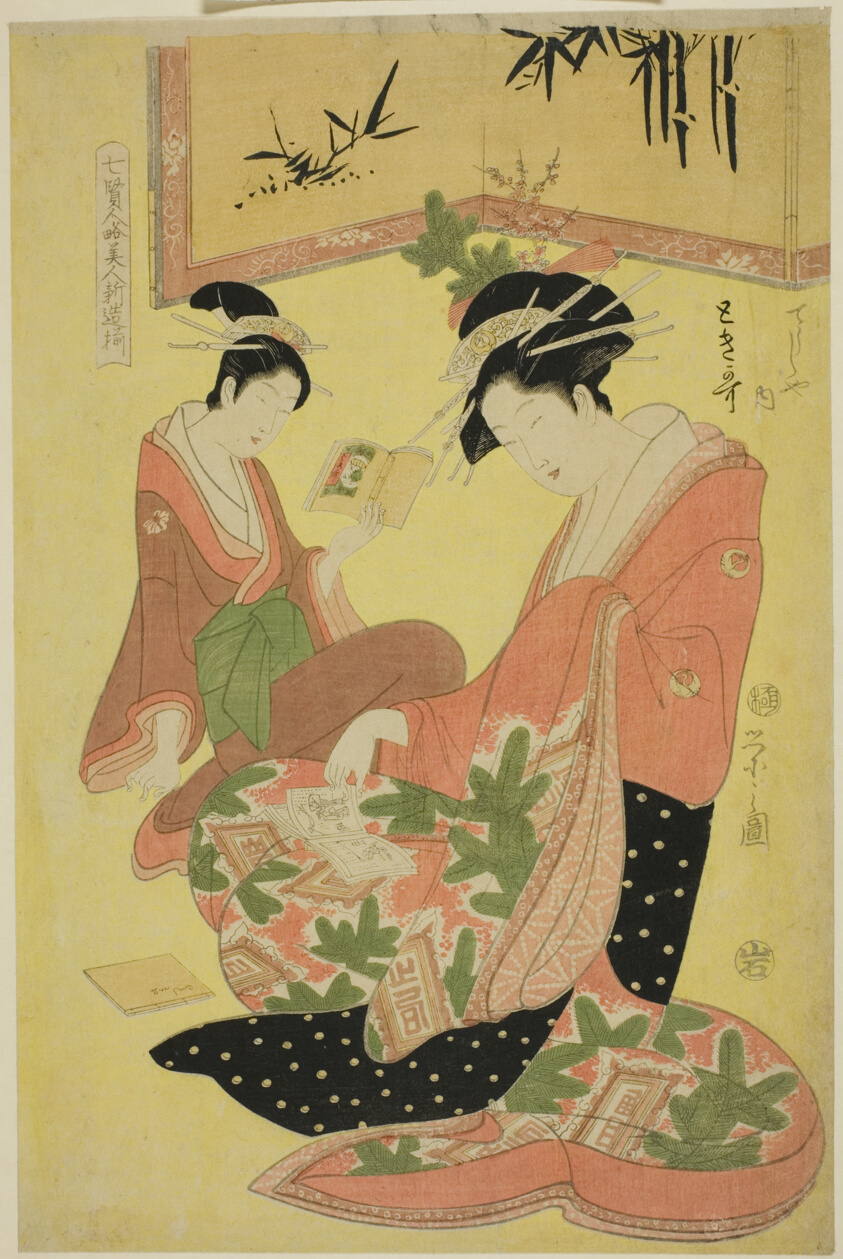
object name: Print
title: Beauties Parodying the Seven Sages - A Selection of Younger Courtesans (Shichi kenjin yatsushi bijin shinzo zoroe): Tokiuta of the Chojiya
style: Japanese (culture or style)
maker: Chobunsai Eishi; Japanese, 1756-1829; Publisher: Iwato-Ya; Japanese, Unknown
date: c. 1793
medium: Color woodblock print; oban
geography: Japan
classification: woodblock print; print; asian art